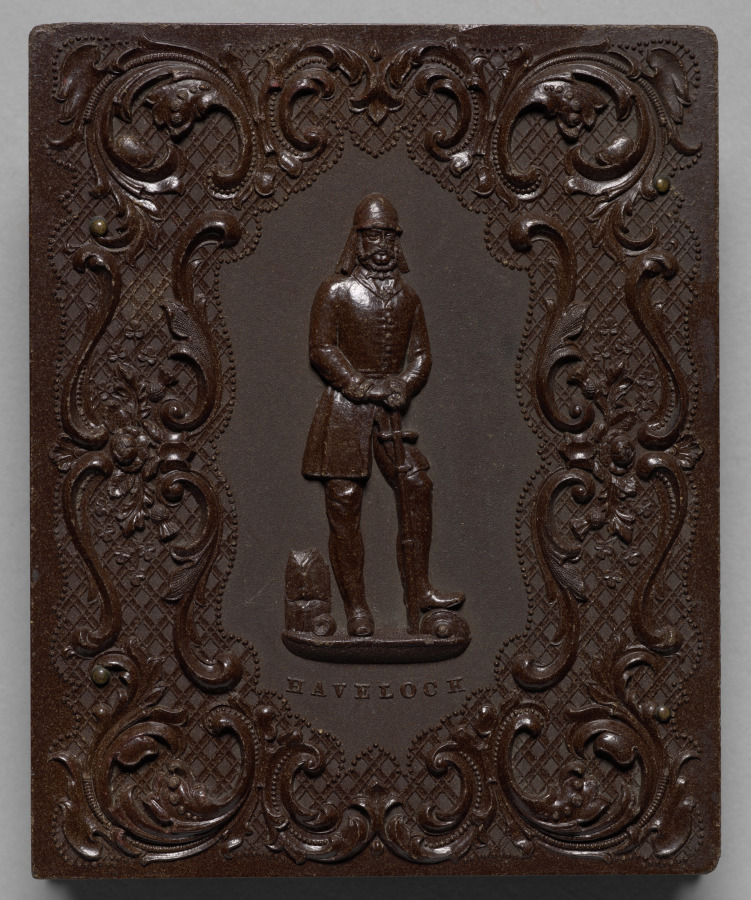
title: Parents of five children doing homework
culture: America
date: c. 1858–60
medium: daguerreotype, quarter plate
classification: Photograph